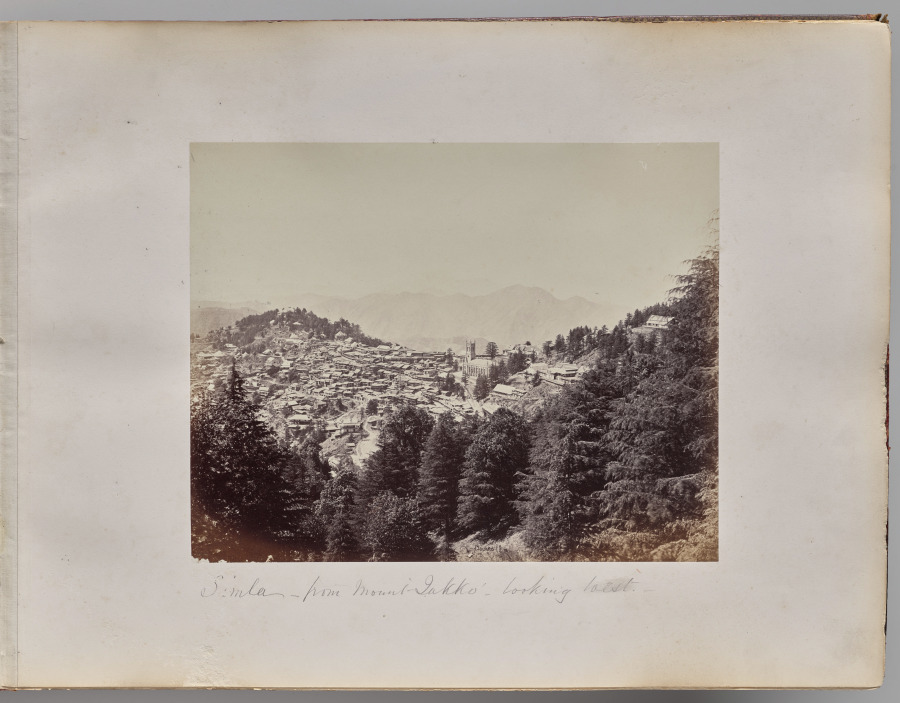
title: Shimla. From Mount Jakko, Looking West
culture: England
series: Photographs of Northern India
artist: Samuel Bourne (British, 1834–1912)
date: 1863–70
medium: albumen print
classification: Photograph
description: The 50 images in this album, all taken in the 1860s, move from the hill towns of the Himalayas down to cities including Lahore (now in Pakistan), Delhi, Lucknow, Agra, Benares (now Varansi), and Calcutta (now Kolkata). Architectural studies of major monuments offer valuable historical records of what sites such as the Taj Mahal and the imperial mosque of the Mughal emperors in Delhi looked like before twentieth-century restorations.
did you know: Samuel Bourne, the author of most the images in this album, was a banker in England before he moved to India to become a professional photographer.